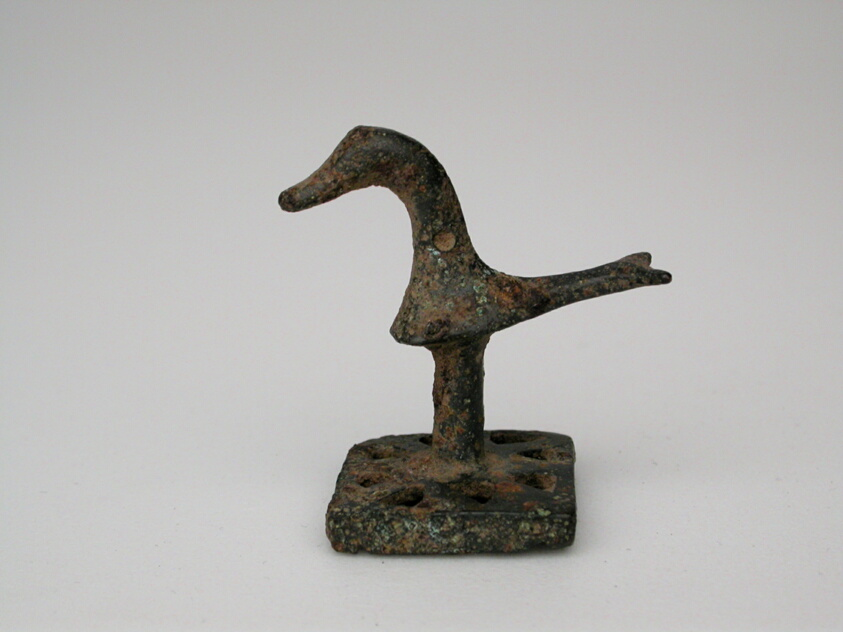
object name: Sculpture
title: Seal with Bird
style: geometric, ancient, greek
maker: Greek; Thessaly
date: Geometric Period (750–700 BCE)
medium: Bronze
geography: Thessalía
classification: votive offering; seal; ex-voto; sculpture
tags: bird